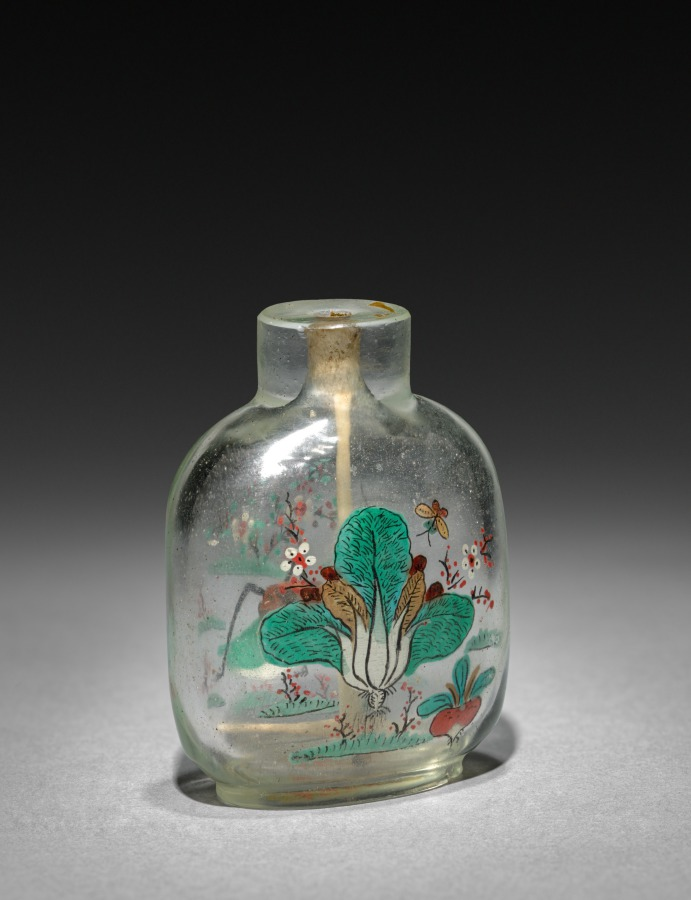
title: Snuff Bottle with Stopper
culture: China, Qing dynasty (1644-1911)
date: 1800s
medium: glass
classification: Glass